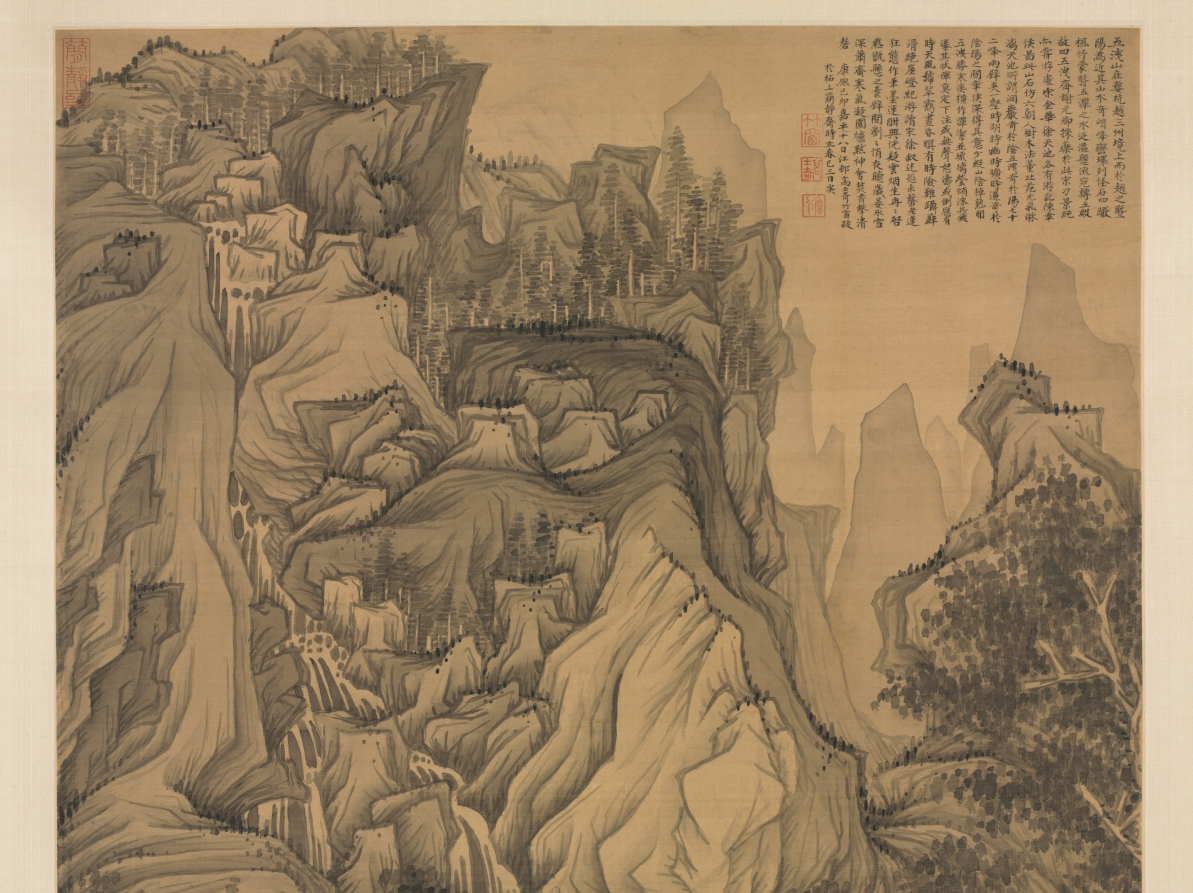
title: The Mountain of Five Cataracts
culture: China, Ming dynasty (1368–1644)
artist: Chen Hongshou (Chinese, 1598/99–1652)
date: c. 1630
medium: hanging scroll; ink on silk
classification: Painting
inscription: Artist's signature and seal at middle right edge: Hongshou [seal] Zhanghou 洪绶 [印]章侯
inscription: Inscription by Gao Shiqi 高士奇 (1645–1704): The Mountain of the Five Cataracts is bordered by three prefectures--Wu [Jinhua], Hang [Hangzhou], and Yue [Shaoxing]--and is quite close to Jiyang [Zhuji] in Yue. The landscape there is extraordinary and precipitous, with ridges and peaks standing in circles. Rocks of strange shapes gaze down everywhere, while maple and bamboo provide shade. The water from five pools overflows and is suspended in five steps--that is why it is called "Five Cataracts." Xie Yuanqing [Xie Tiao 謝朓, c. 464–499] of the Qi Dynasty gathered medicinal herbs here; Diao Jingchun [Diao yue 刁約, 11th century] of the Song Dynasty also visited here; Song Jinhua [Song Lian 宋濂, 1310–1381] and Xu Tianchi [Xu Wei 徐渭, 1521–1593] both wrote travel notes about the place; and Chen Hongshou painted here. His mountains are done in the style of the Six Dynasties masters; the trees are after those of Dong Beiyuan [董源 Dong Yuan, active during the Five Dynasties]--the painting seems to be richly imbued with the primeval spirit. Xu Wei said that the grotto is unique for the shade (yin) and the five cataracts unusual for the sun (yang). There are seventy-two peaks, with a ravine between two cliffs. At times they are bright and at other times, gloomy; sometimes they seem to be open, sometimes closed, yet often border uniquely between shady (yin) and sunny (yang). Zhanghou [Chen Hongshou] really succeeded in capturing that spirit. As a young man indulgently boating through Shanyin [Shaoxing],/ I became familiar with the beauty of the Five Cataracts./ The cold streams, when level, become pools clear as crystal./ Pouring foam mingled with flying waterfall,/ Its shapes constantly changing./ Water would flow downward without a sound,/ Or become raging billows emitting echoes./ Sometimes the wind from the sky would wail,/ The green forest during the day would turn dark./ Sometimes it was dangerous and difficult to ascend,/ For the moss was slippery on the stone steps in those precipitous cliffs./ After reading the travel notes of Sung [Lian] and Xu [Wei],/ I'm afraid their descriptions are incomplete. / Yet when Laolian [Chen Hongshou] was seized with the inspiration to paint,/ His brush and ink moved with exhilaration./ It is as if mists have risen/ From a hot cooking pot, gradually opened./ By hanging this on a plain wall,/ One can clearly listen to the quiet night./ At the end of the year, ice and snow are deep;/ The cold air in the quiet studio is frozen./ Near the fireplace, I make with it a silent, spiritual acquaintance/ Burning incense and striking a lucid qing [stone chime]. On the eighteenth day of the twelfth month in the jimao year of the Kangxi era [1699]. Jiangcun, Gao Shiqi. Zhuchuang inscribed this at Zhe in the Lan Jing studio. It was the third day after the beginning of spring. trans. LYSL/HK/WKH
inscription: Collector's inscription by Gao Shiqi 高士奇 (1645–1704), one column in standard script at the lower left corner: 信天巢秘藏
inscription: 5 seals of Gao Shiqi 高士奇 (1645–1704): 竹窗 Zhu Chuang; 高士奇 Gao Shiqi; 澹人 Danren; 簡靜齋 Jian Jing Zhai (Gao Shiqi's studio; at the upper left corner); 高氏江村草堂珍藏書畫之印 Gaoshi Jiangcun Caotang Zhencang shuhua zhi yin (at the lower left corner).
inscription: Two additional seals at the lower left and right corners are undecipherable.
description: A unique landscape painting in the existing body of Chen Hongshou’s art, this painting reveals his involvement with the practice of fang (imitation) to achieve creative transformation. Chen acquired the tradition stemming from Dong Yuan of the Five Dynasties, with which he sought an artistic individuality that lends his work an idiosyncratic vision and extraordinary power.